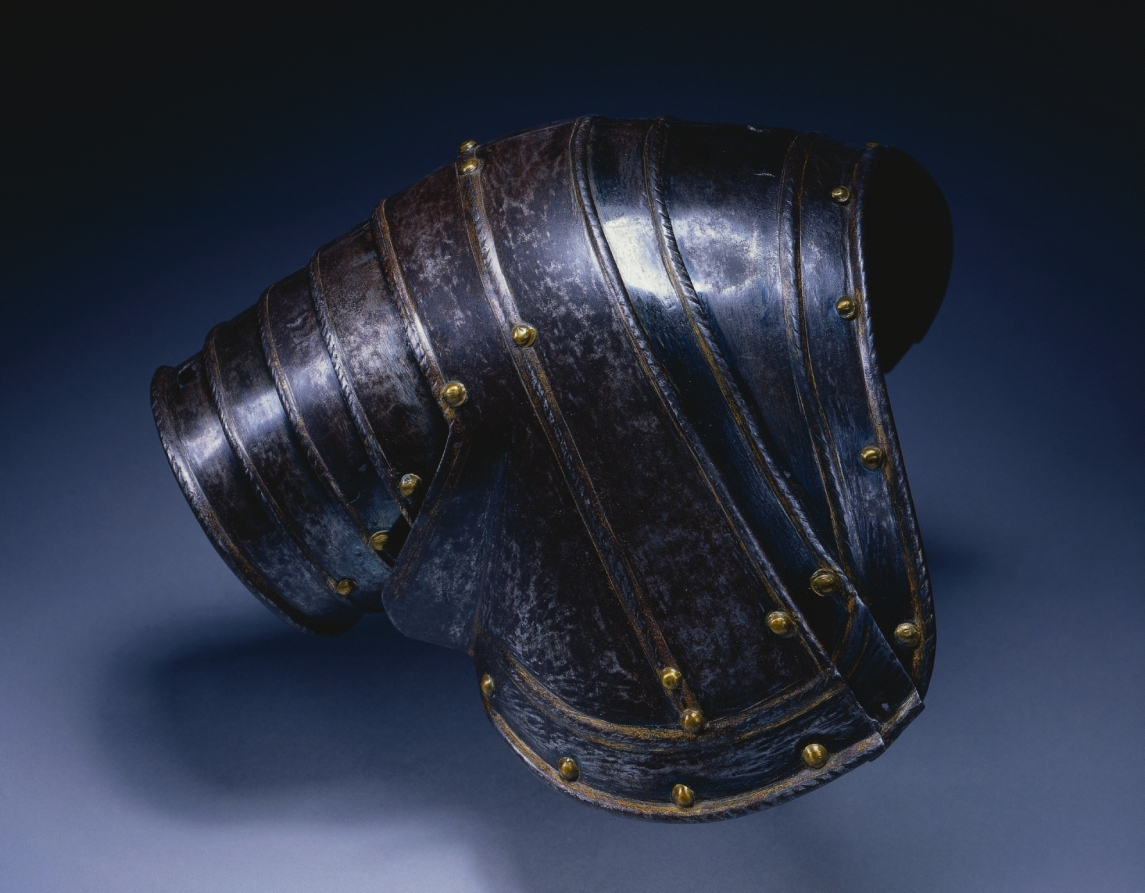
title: Pauldron for Right shoulder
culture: Italy, 16th century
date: c. 1560–70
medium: steel, blued and gilded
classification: Arms and Armor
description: This element for the shoulder once belonged to a suit decorated by the bluing technique, a process of superheating armor plates to achieve a deep blue color. Bluing required heating to at least 590 degrees Fahrenheit, the temperature at which oxidation occurs. Although the original color is now darkened it would have originally been a deep shade of blue. It was further enhanced with gilding to create additional contrast for a refined appearance.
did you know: A pauldron is a component of plate armor that covers the shoulder and often the armpit, and parts of the back and chest as well.